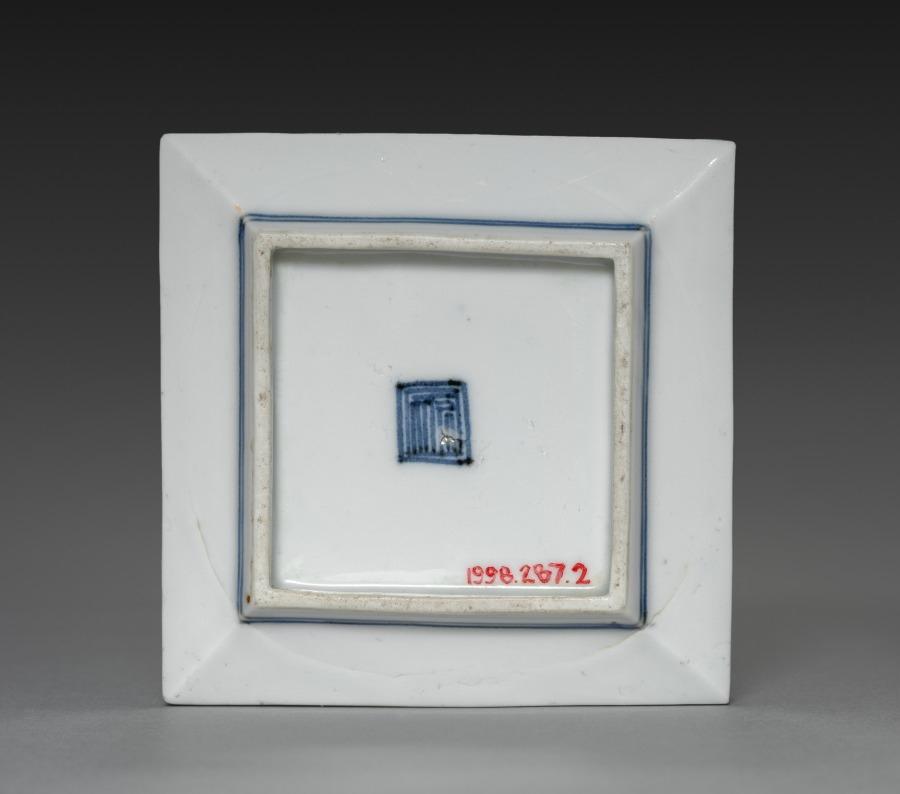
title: Side-Dish with Dandelion in Rocks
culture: Japan, Edo period (1615–1868)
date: 1700s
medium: One of a set of five dishes; porcelain with underglaze blue and overglaze iron oxide (Arita ware, Kutani style)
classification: Ceramic